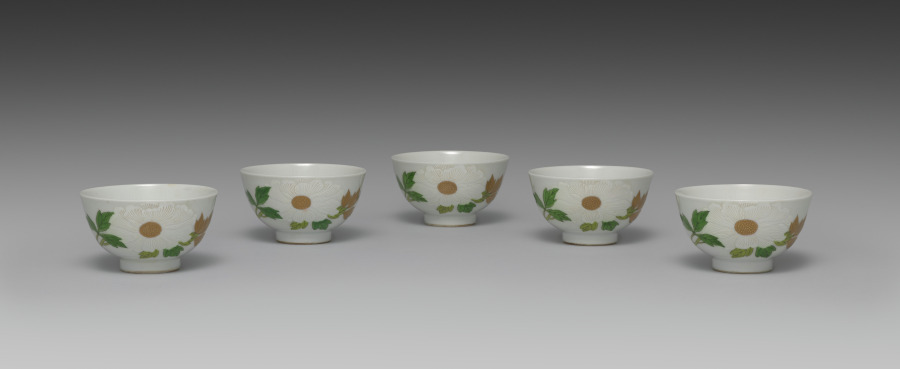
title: Teabowls with Peony and Crabapple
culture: Japan, Meiji period (1868–1912)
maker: Seifū Yohei III (Japanese, 1851–1914)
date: 1893–1914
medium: Set of five teabowls; porcelain with underglaze and overglaze color enamels and gold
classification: Ceramic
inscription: 清風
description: Overglaze color enamels are generally called iro-e (literally “color picture”) in the terminology customarily used for porcelain decoration of the Edo period. This set of teabowls is a fine example of Yohei III’s skilled use of the technique, which is identified on this set’s box lid with the alternate phrasing “porcelain with color painting” (jisaiga). Distinct from the way overglaze colors were used in Kakiemon ware from Arita, his designs and applications show a consciousness of porcelain decoration of the Qing dynasty. Here, he combines Chinese models with a sensibility taken from Kyoto ware precedents, including painting with powdered gold (kinrande). The colors used in the bowls are as follows: blue, black, gold, white, light green, green, and pink. The blue appears only inside the footring, as a double band of underglaze color. The black iron, used for stems and leaf veins, is painted over the glaze. The gold, also painted over the glaze, is used for leaves and the centers of flowers, for solid, glossy lines defining detail, or as a semimatte ground. The white of the peony flower is built up to a low relief over the glaze. Yohei has incised lines of varying widths into the pigment, carving away to the bowl’s surface, to differentiate individual petals and their rippled shapes. The light and dark greens, as well as the pink, are painted over the glaze. Of note is how Yohei has first used thinly applied lines of light green to draw the plum branch before applying the opaque iron black. For the plum buds and flowers, he has used a diluted pink with an opaque pink for outline, both over the glaze. In his later works, Yohei used pink both over and under the glaze in a manner similar to underglaze blue, and it can be challenging in some cases to discern which technique he has used. A lidded container in a private collection has a similar design but is augmented with the inclusion of white and purple magnolia blossoms. In contemplating the original decorative program of a set, of which these teabowls may have been a part, it is worth considering that perhaps not all objects included the full range of motifs. In such cases, the composition of the individual object may be best understood within the context of the extended ensemble. Here, the delicate pink plum on one side of the bowl seems slightly unbalanced with the bold white peony on the other, but when seen with other objects with the magnolia and its additional colors and shapes, it is possible to imagine a set with a complex, balanced design across multiple pieces.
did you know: These five teabowls were likely from a larger set of teaware.